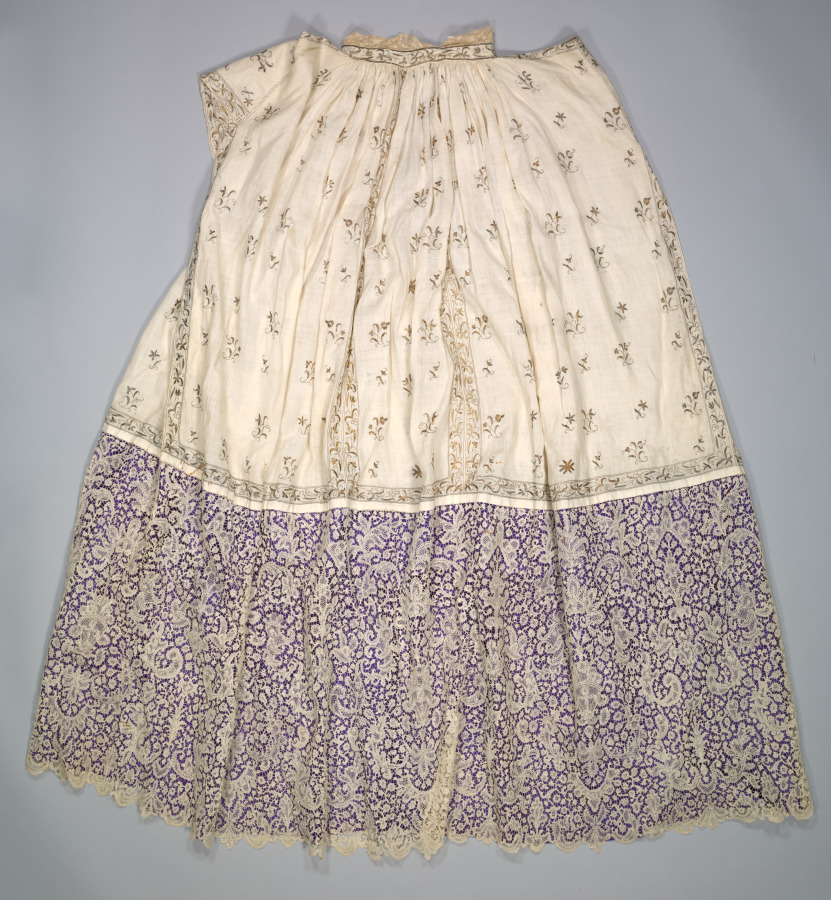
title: Alb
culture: Spain: embroidered linen; Flanders: bobbin lace (Point d’Angleterre) flounce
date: Embroidered Linen: 1600s; Bobbin Lace (Point d’Angleterre) Flounce: 1700s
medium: Plain weave linen embroidered in gold and silver; linen bobbin lace (Point d’Angleterre a Reseau)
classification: Garment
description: This beautiful vestment, called an alb, was worn under other liturgical garments by the clergy who served at the altar. Embroidered with gilt-metal thread flora on a linen ground, it is trimmed with a flounce and cuffs of lace, the most fashionable and expensive material at the time. Its purple silk lining indicates that it belonged to an archbishop. The exquisitely worked bobbin lace consists of two large composite floral designs flanked by popular curved forms on an elaborate bar ground that repeats ten times around the flounce.